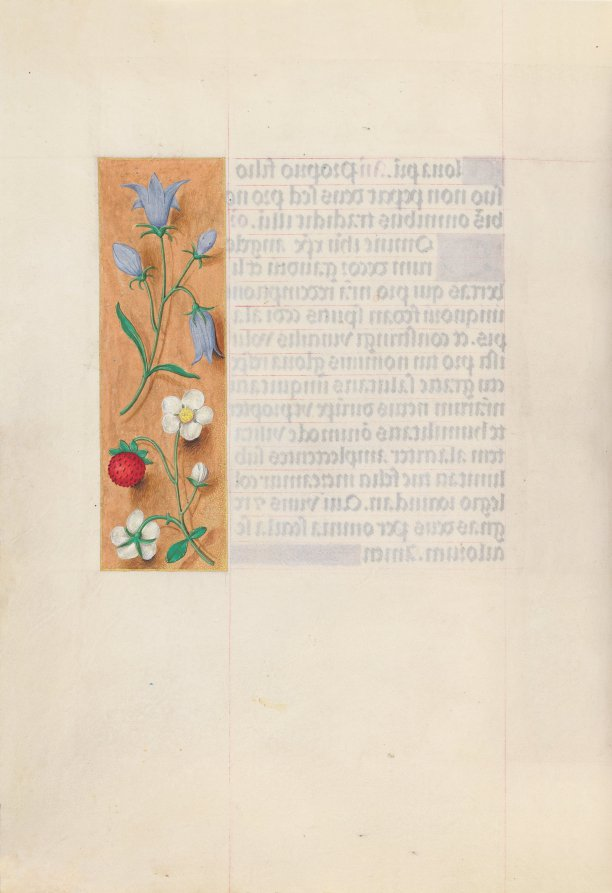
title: Hours of Queen Isabella the Catholic, Queen of Spain: Fol. 60v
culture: Flanders, Ghent and Bruges, late 15th century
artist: Master of the First Prayerbook of Maximillian (Flemish, c. 1444–1519)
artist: and Associates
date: c. 1500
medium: ink, tempera, and gold on vellum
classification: Bound Volume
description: This manuscript was illuminated by a circle of at least five highly organized manuscript painters active in the Flemish cities of Ghent and Bruges. The principal illuminator was Alexander Bening, who painted the majority of the book's miniatures. Manuscripts produced by this circle of artists are renowned for the decoration of their borders, which typically feature a rich variety of realistically-painted flowers, birds, and butterflies. This prayer book, called a book of hours, was intended not for a cleric, but for the private devotions of a lay person-in this case, Isabella the Catholic, Queen of Spain (1451-1504). Isabella's coat of arms embellishes the book's frontispiece. It is unlikely that the book was commissioned by the Queen herself; rather, she probably received it as a diplomatic gift from someone courting her patronage, perhaps Cardinal Francisco Jimenez de Cisneros. A Franciscan friar, Jimenez was dependent upon Isabella for his advancement, first to the post of Queen's confessor in 1492, and then to Archbishop of Toledo in 1495.